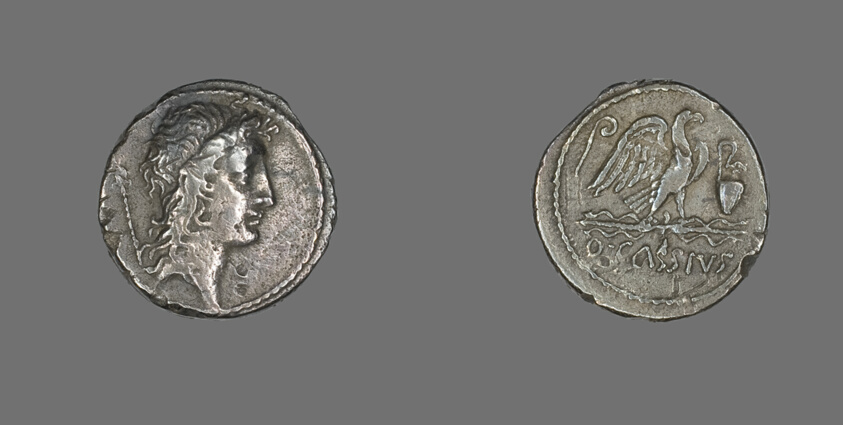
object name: Coin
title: Denarius (Coin) Depicting the Genius Populi Romani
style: roman (ancient, style or period), ancient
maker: Roman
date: about 55 BCE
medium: Silver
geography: Roman Empire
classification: coin; ancient art